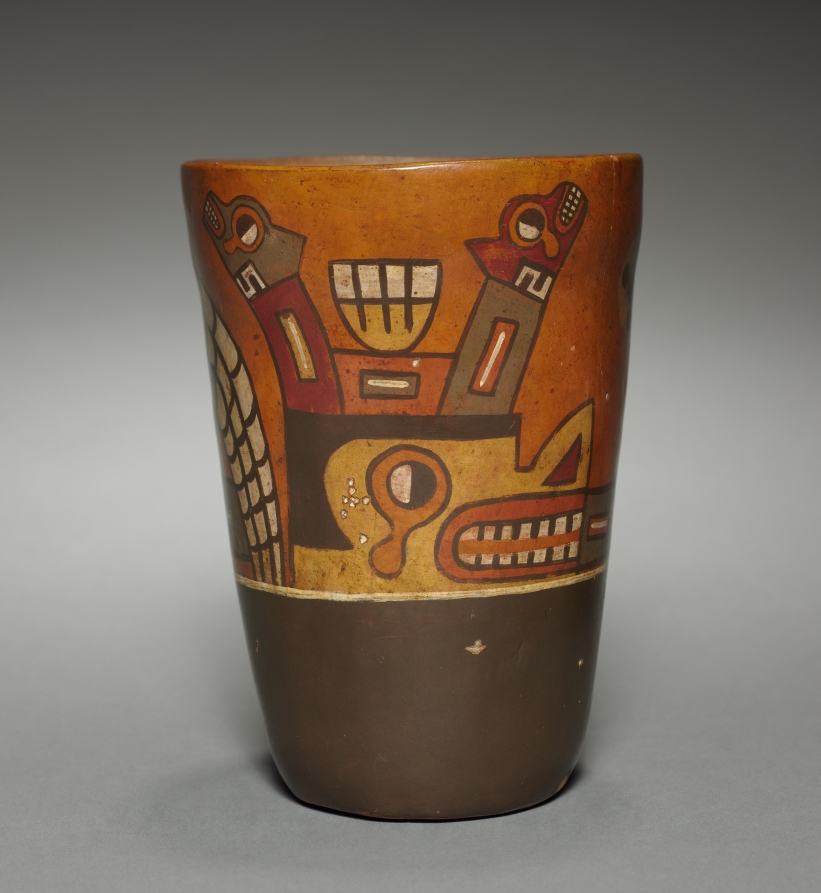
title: Kero-shaped Vessel (modern version of a Wari-style vessel)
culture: Peru, modern, 20th century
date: before 1955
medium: pottery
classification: Forgery